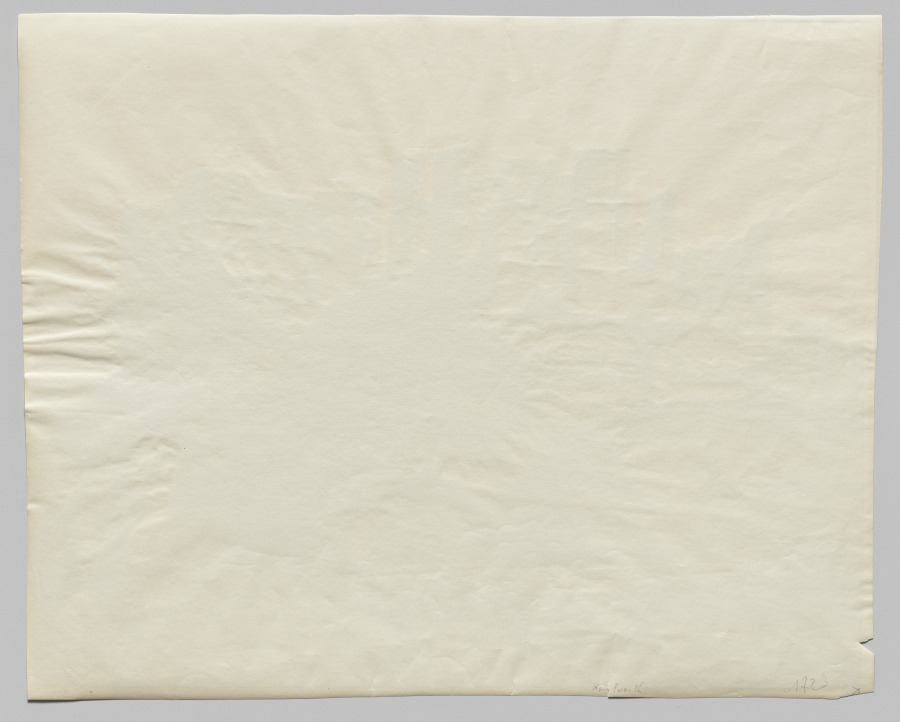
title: Kenilworth Castle, Warwickshire, England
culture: France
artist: Adolphe Braun (French, 1812–1877)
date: c. 1870s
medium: mammoth untrimmed carbon print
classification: Photograph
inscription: Set of numbers imprinted in margin on recto, left side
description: Kenilworth Castle has been a tourist attraction since the late 1700s. It gained an even larger audience when it became the subject of Sir Walter Scott's popular historical romance novel Kenilworth in1821.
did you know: Kenilworth Castle comprises five centuries of English military and civil architecture from a medieval fortress to an Elizabethan palace.